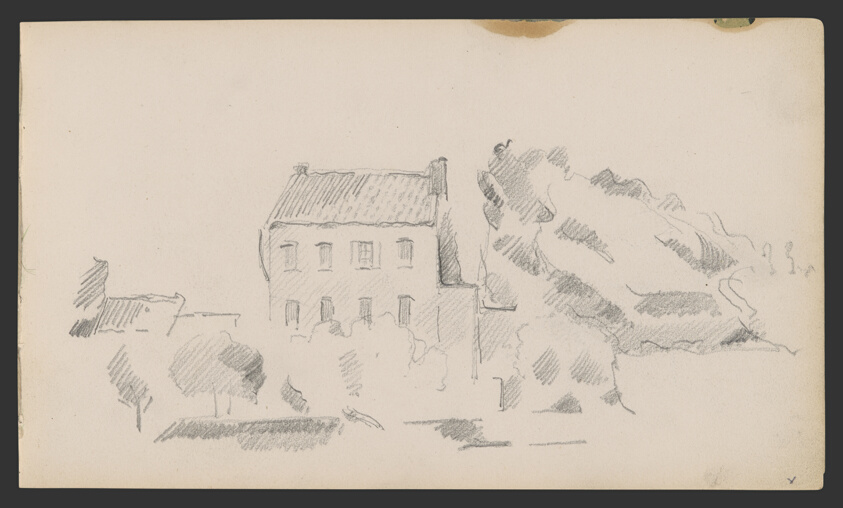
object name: Drawing and Watercolor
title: Sketchbook No. 2 (L'Estaque)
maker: Paul Cézanne; French, 1839-1906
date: 1875–86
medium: Graphite and pen and ink drawings on paper, bound into a book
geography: France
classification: sketchbook; graphite; prints and drawing; paper